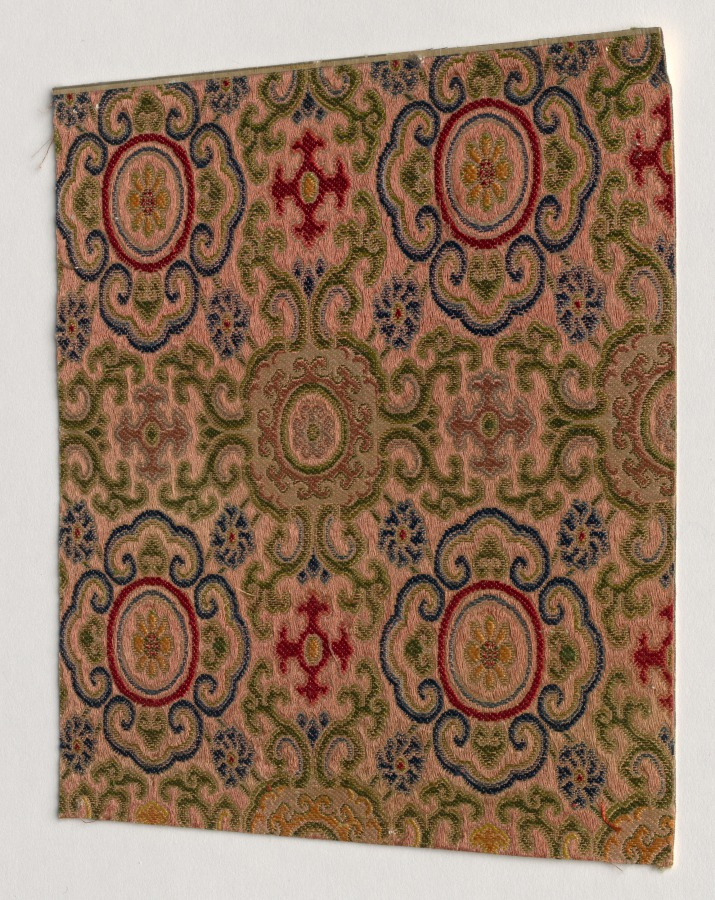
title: Fragment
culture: China, 19th century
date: 1800s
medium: silk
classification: Textile